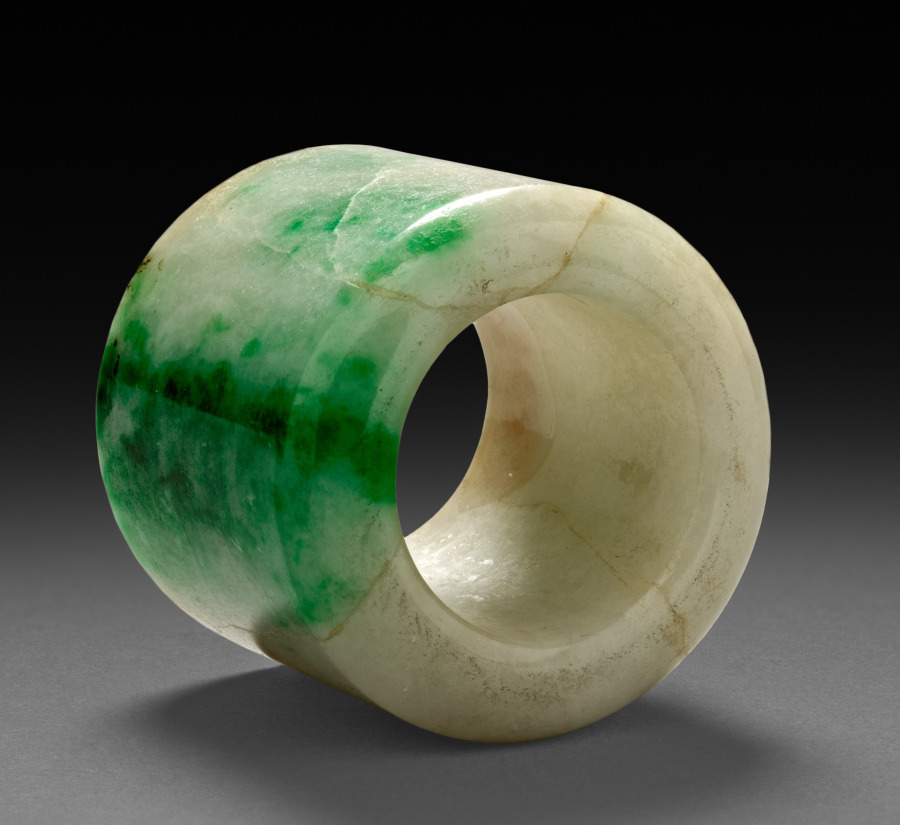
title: Thumb Ring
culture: China, Qing dynasty (1644-1911) or Republican period (1912-49)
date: 1800s–1900s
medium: white and green jade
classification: Jewelry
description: Jade rings were worn by men on the thumb of the right hand to assist with holding and pulling the string of the archer’s bow. However, thumb rings were also fashionable accessories for civil officials in the late Qing dynasty.